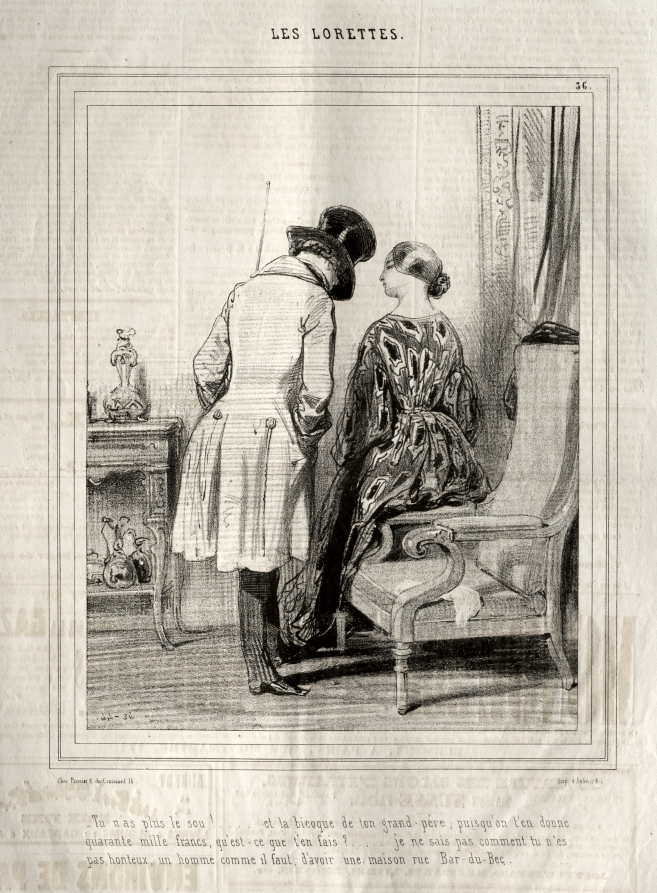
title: Les Lorettes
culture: France, 19th century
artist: Paul Gavarni (French, 1804–1866)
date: 1842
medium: lithograph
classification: Print